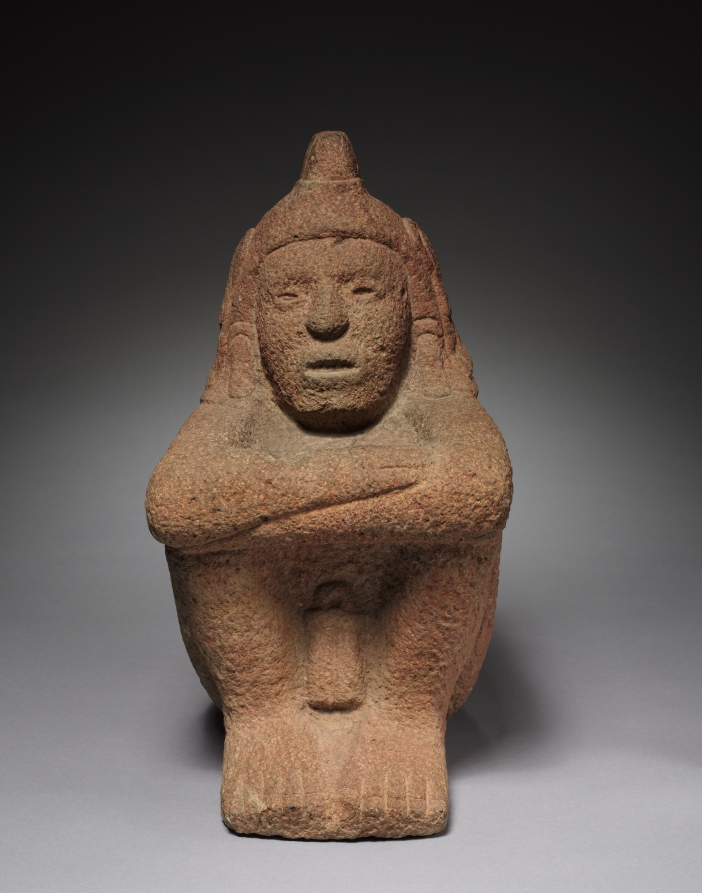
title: Seated Deity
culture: Mexico, Aztec, Valley of Mexico near Teotihuacan, Macuilxochitl (?), 14th-16th century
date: 1350–1519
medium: gray volcanic stone with red pigment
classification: Sculpture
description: The crested headdress with tassels suggests that this youthful, seated male is Macuilxochitl (Five Flower), an Aztec supernatural patron of many forms of pleasure, among them music, dance, feasting, games, and sex. His cult was popular among common people, and this effigy probably was created for use in a small neighborhood temple. The stone surface could have been plastered and then brightly painted.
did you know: The Aztecs associated the number 5 with excess: there were five gods of pleasure, one named “Five Flower.”